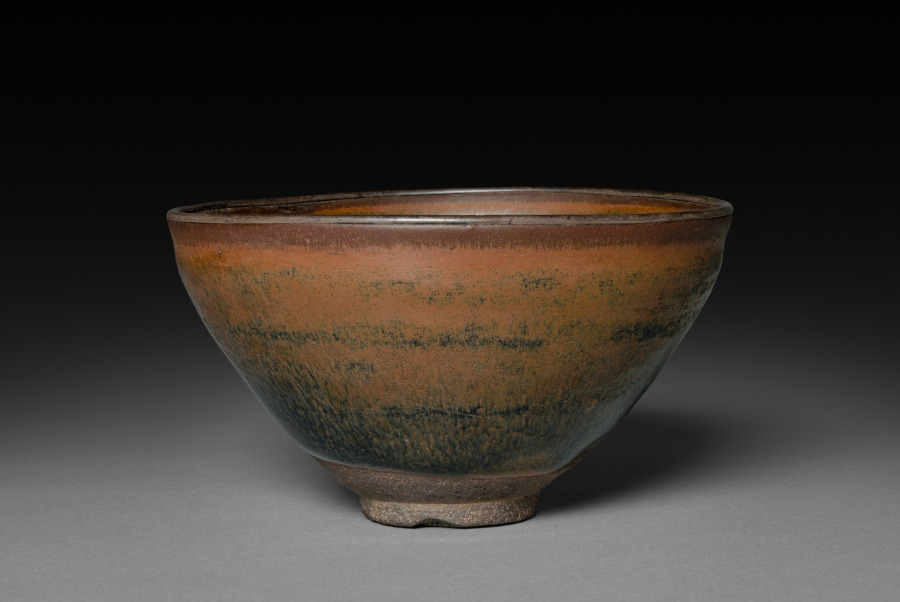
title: Tea Bowl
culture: China, Fujian province, Song dynasty (960-1279)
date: 960–1279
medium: purplish brown stoneware with iron slip glaze coating, Jian ware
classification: Ceramic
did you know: Jian ware was very popular with the tea cultures in China and Japan.